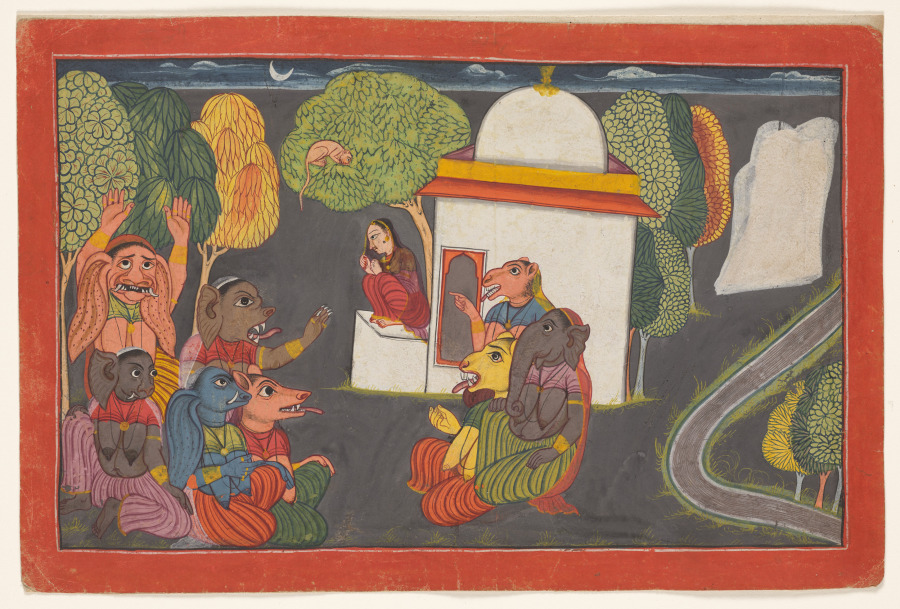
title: Hanuman spies Sita in the Ashoka Grove, from the “Shangri” Ramayana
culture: Northern India, Pahari kingdoms, Himachal Pradesh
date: c. 1700–25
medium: Gum tempera and ink on paper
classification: Painting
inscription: Verso: in Devanagari 31 Suṃdara; inverted: ||34||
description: After her abduction, Sita is imprisoned in a garden on the island of Lanka. Female guards appointed by her captor, the demon Ravana, surround her and jeer as she crouches on a step. The monkey in the tree above her is the hero Hanuman, a loyal friend to her husband Rama. He shrank to disguise himself and gives her a message: now that he has found her, he will bring Rama and their armies to rescue her.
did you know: The female guards have human bodies and fanciful animal heads.